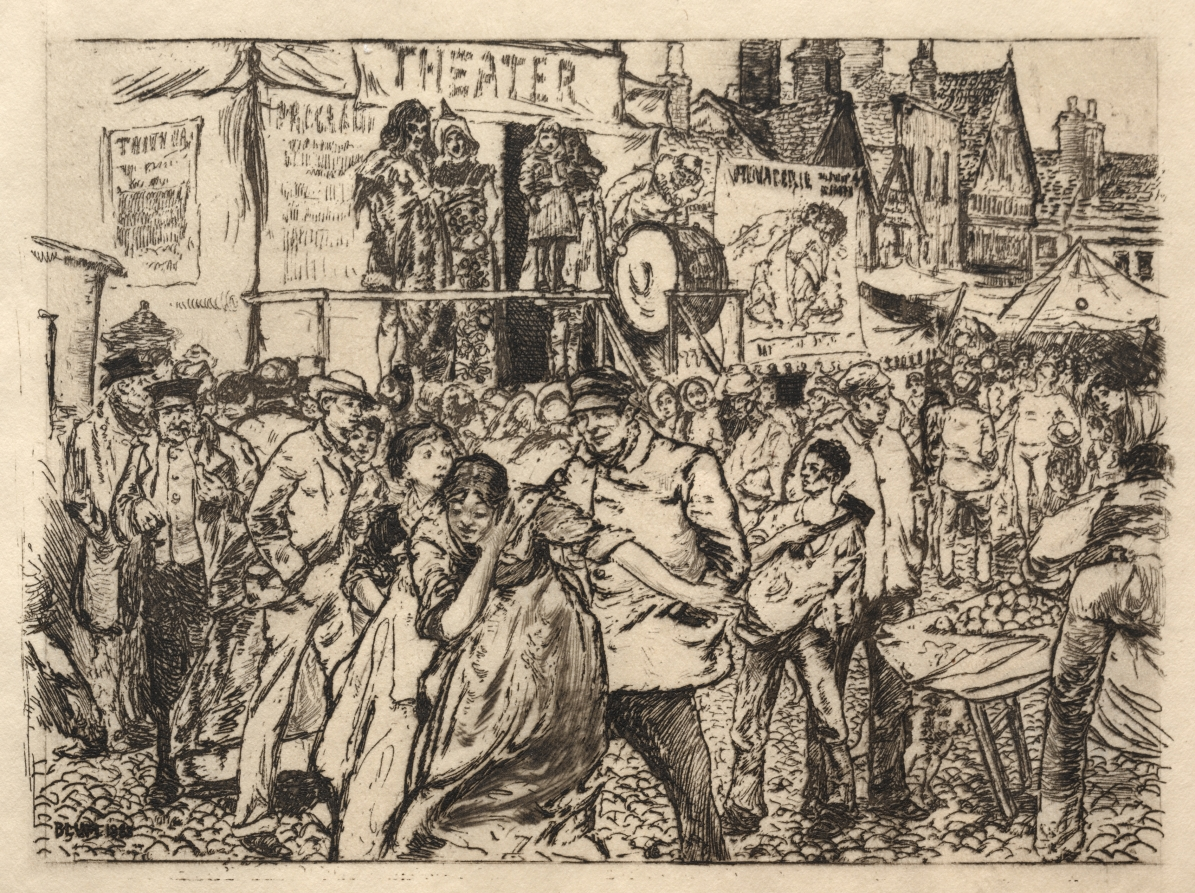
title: An Illustration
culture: America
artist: Robert Frederick Blum (American, 1857–1903)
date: 1883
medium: etching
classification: Print